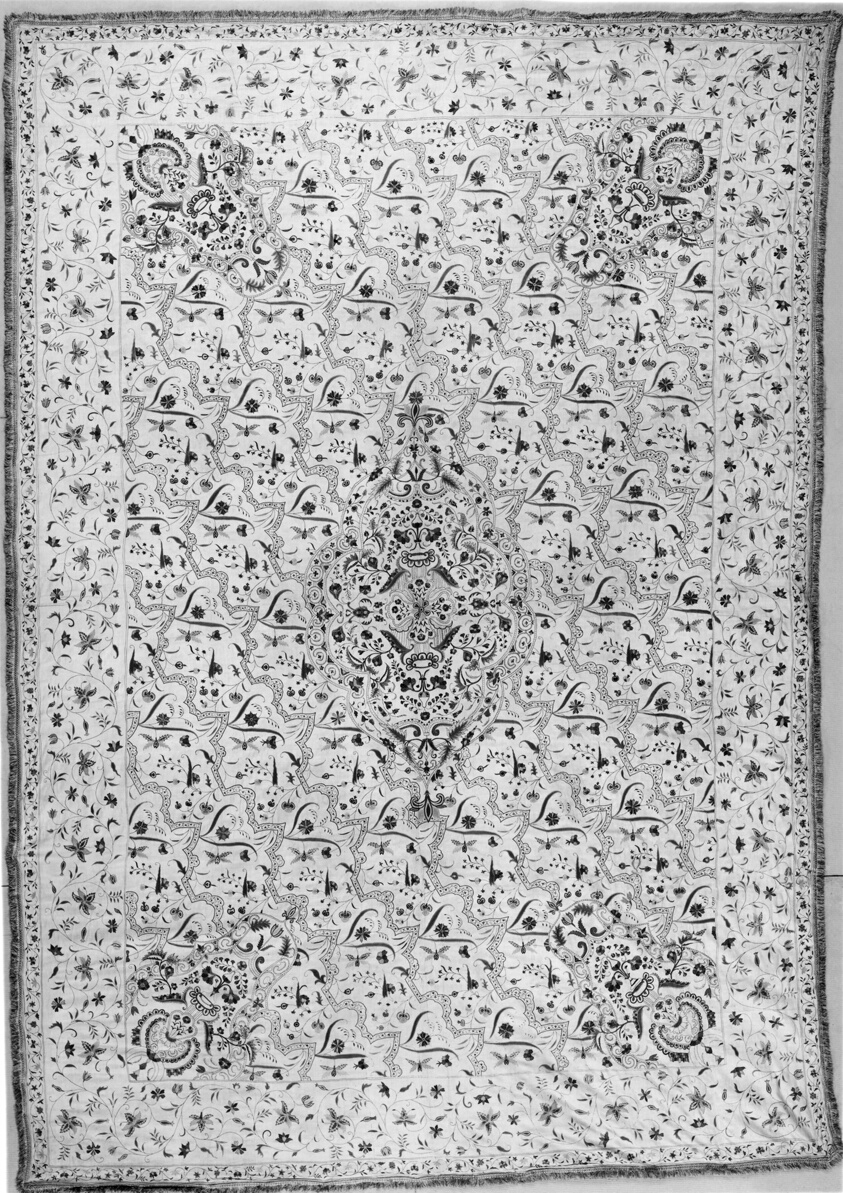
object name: Textile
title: Bedspread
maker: India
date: 18th century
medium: Embroidered with silk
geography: India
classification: textile; needlework (visual works)